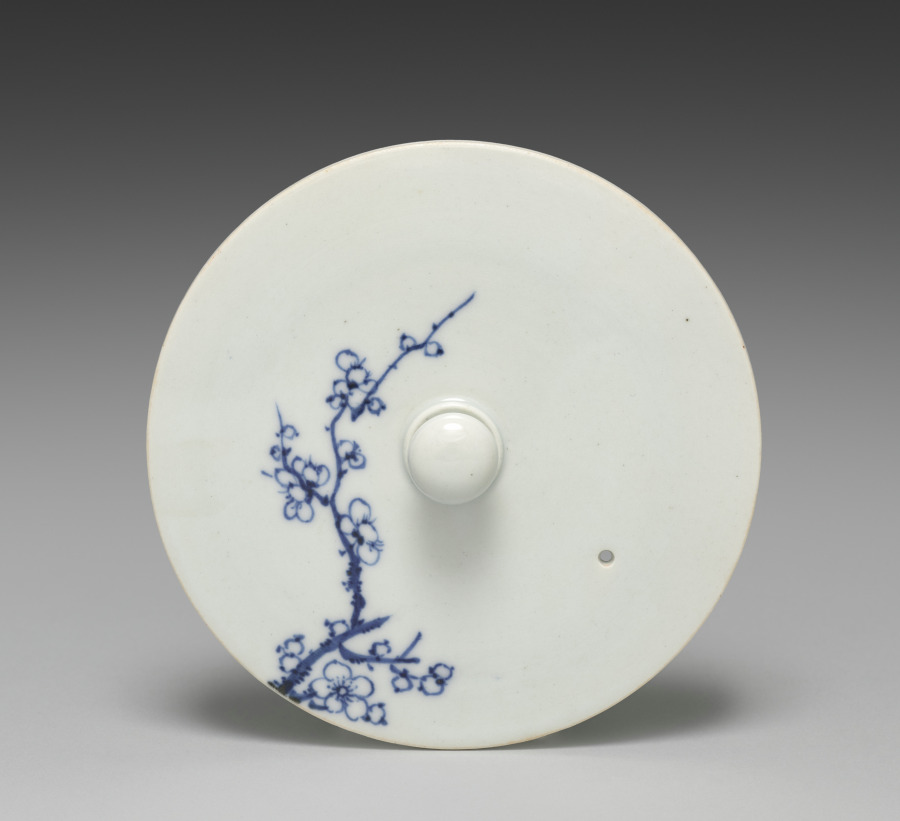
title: Lid for a Sake Pourer with Chrysanthemum, Orchid, and Plum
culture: Japan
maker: Seifū Yohei III (Japanese, 1851–1914)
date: c. 1887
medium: Porcelain with underglaze blue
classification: Ceramic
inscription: Artist's signature in underglaze blue on the base.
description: This sake pourers has a wide basin with a low foot; a generous spout open across the top half; a flat, round lid with a small knob recessed flush to the top of the container; and a tall, arched handle that meets the container where the top joins the basin at a sharp angle. It has a painting in underglaze blue of the Four Nobles: chrysanthemum, orchid, plum, and bamboo. Unlike the creamy white color of some Yohei III works, the white of this sake pourer has the bluish cast typical of porcelains produced in Kyoto. It is signed in underglaze blue on the base.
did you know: This sake pourer is decorated with the Chinese theme of the Four Nobles, in which the qualities of a good person are represented by plant.